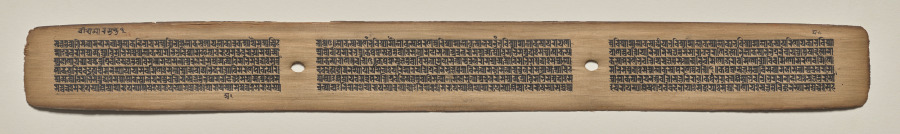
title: Text, Folio 104 (recto), from a Manuscript of the Perfection of Wisdom in Eight Thousand Lines (Ashtasahasrika Prajnaparamita-sutra)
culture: Eastern India, Bihar, Vikramashila Monastery. Painting: Nepal, Kathmandu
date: Sunday, September 14, 1119 (year 239 of the Newar Samvat in the month of Ashvina)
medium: gum tempera and ink on palm leaves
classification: Painting